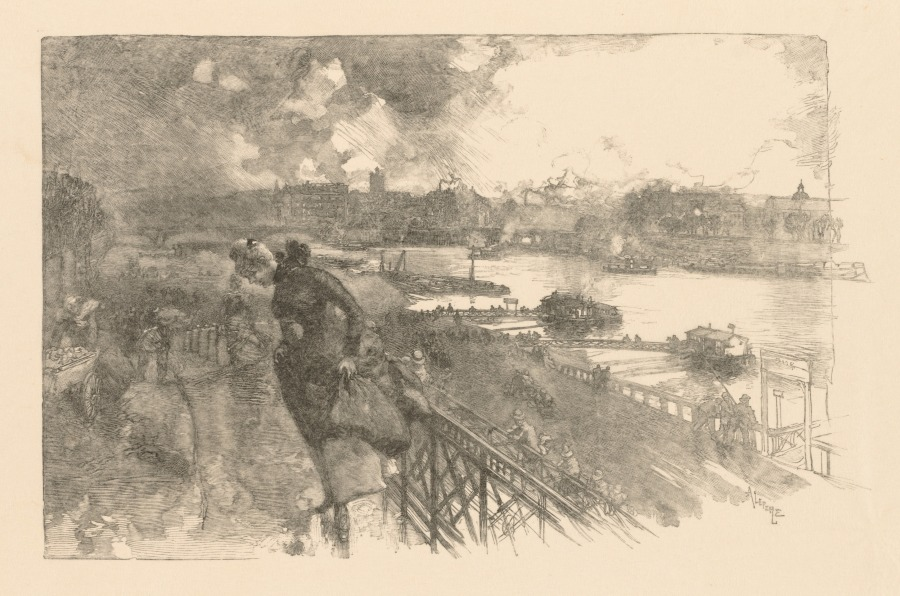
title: La Seine au Pont d'Austerlitz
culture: France, 19th century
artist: Auguste Louis Lepère (French, 1849–1918)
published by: published in L'Estampe Originale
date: 1866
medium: wood engraving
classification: Print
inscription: Inscribed in plate, lower right: A Lepere Dealer's notation on mat, lower right, in graphite: one of 20 impressions without the stamp of L'Estampe Originale